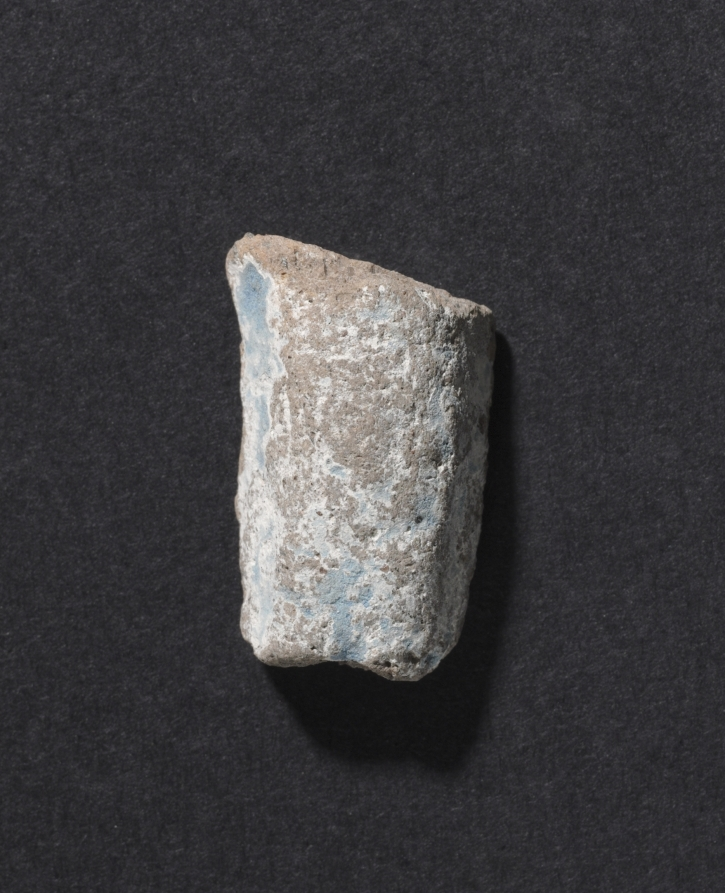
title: Shawabty of Ditamenpaankh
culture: Egypt, Late period (715–332 BCE), Dynasty 25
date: 715–656 BCE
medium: terracotta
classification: Funerary Equipment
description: High demand for shawabtys in the Late Period, a time when as many as 400 or more shawabtys were placed in the tomb with the deceased, gave rise to a specialized container for storing them: the shawabty box. This example is inscribed for the lady of the house, Ditamenpaankh, and was probably one of a pair originally made for her. The single-masted boat on the box's lid is perhaps an allusion to the pilgrimage of the deceased to the holy city of Abydos, the cult city of Osiris, king of the dead. The shawabtys inside are crude, mass-produced examples cast in an open mold. Made of terracotta, their blue paint imitates more costly shawabtys made of faience. As for the shawabty spell, it has been removed from its traditional location on the shawabty's front and relocated onto the sides of box, where it needed only to be written once, thus expediting production.